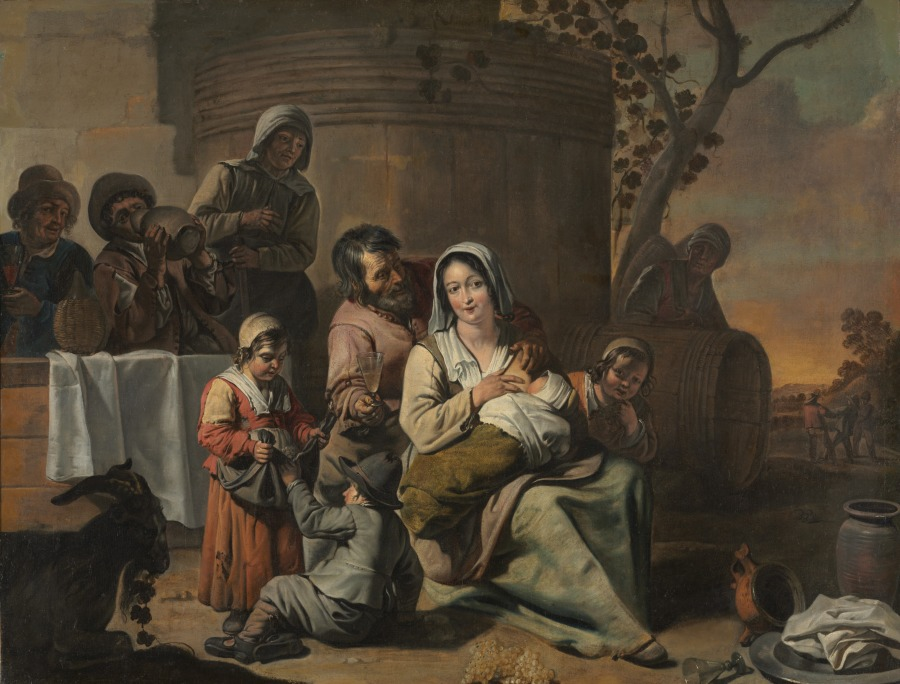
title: Vintage Scene and Peasant Children Dancing (painting pair)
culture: France, 17th century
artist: circle of Le Nain (French)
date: 1650s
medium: oil on canvas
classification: Painting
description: The mid-17th century saw revived interest in representations of the lower classes. Artists like the Le Nain brothers in France painted scenes that looked back to the Renaissance tradition of pastoral imagery. The Le Nain often depicted ordinary country folk going about their daily business, subjects and figures they remembered from their childhood in rural Laon. Considered a companion piece to Peasant Children Dancing (1958.175.2), Vintage Scene has also been attributed to the Master of the Béguins, a Flemish artist who worked in the manner of the Le Nain in Paris. Here, good-natured though bawdy males drink in the background shade, while at center a sweet-faced young woman surrounded by chubby children flashes the viewer a coy smile that reveals her awareness of the slowly creeping hand of her drunk companion. While peasants drinking was a popular subject among Flemish artists, the theme of wine connects the subject with the grape harvest, which recalls the Le Nain's agricultural homeland in France. This use of both aesthetic and biographical aspects of the Le Nain's lives demonstrates the Master of Béguins' ability to absorb the stylistic and thematic lessons of the famous brothers.